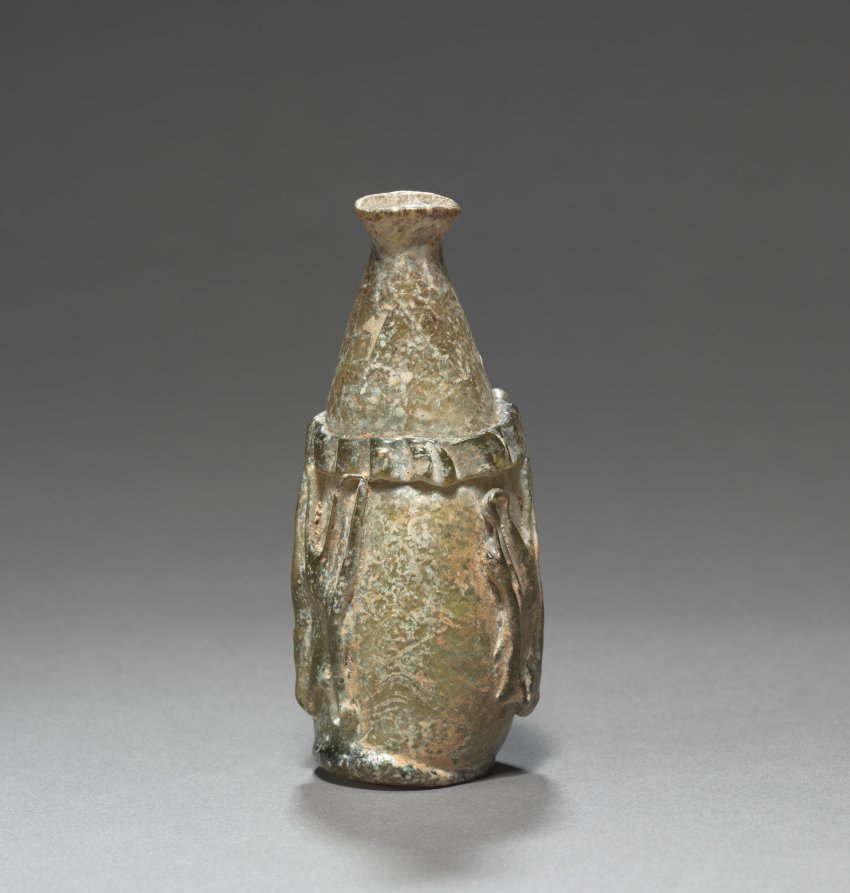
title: Bottle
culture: Early Islamic, Eastern Mediterranean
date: 600s–800s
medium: glass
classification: Glass